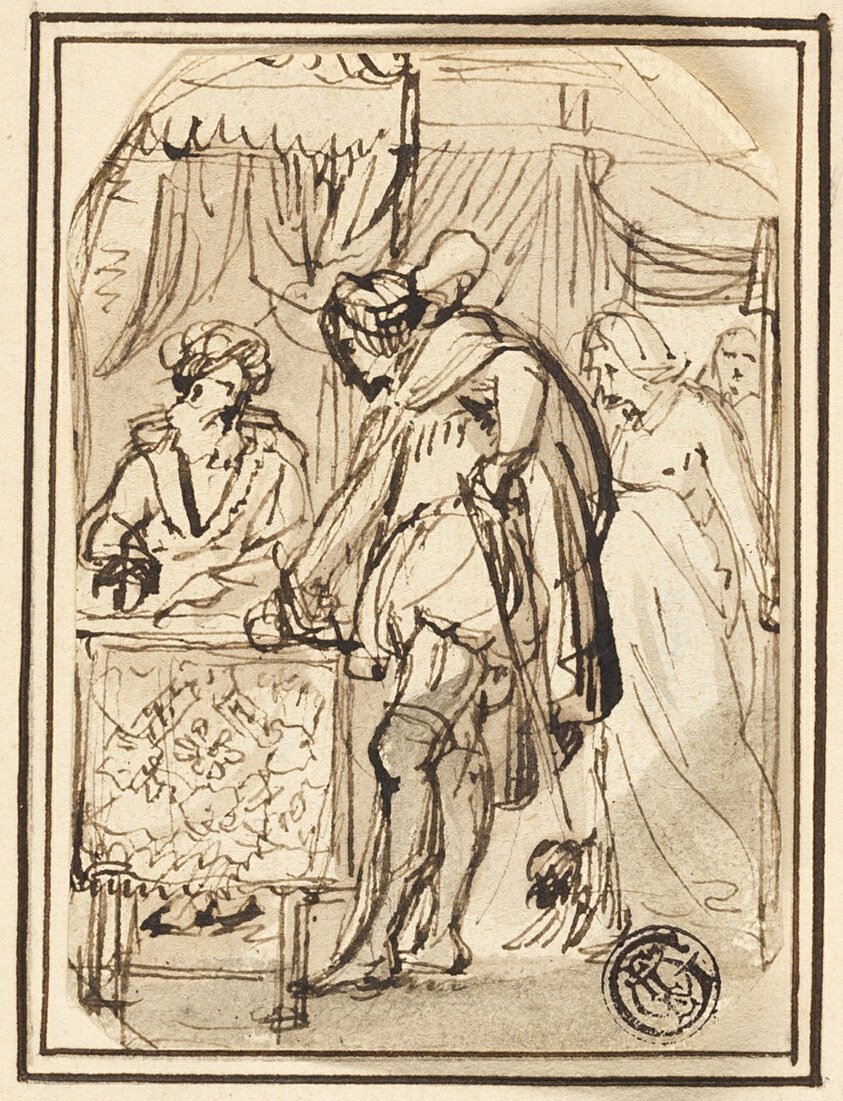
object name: Drawing and Watercolor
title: Young Man at Scribe's Table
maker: Attributed to Thomas Stothard; English, 1755-1834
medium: Pen and brown ink with brush and brown wash, on ivory laid paper, tipped onto cream laid paper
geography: England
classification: pen and ink drawings; drawings (visual works); prints and drawing